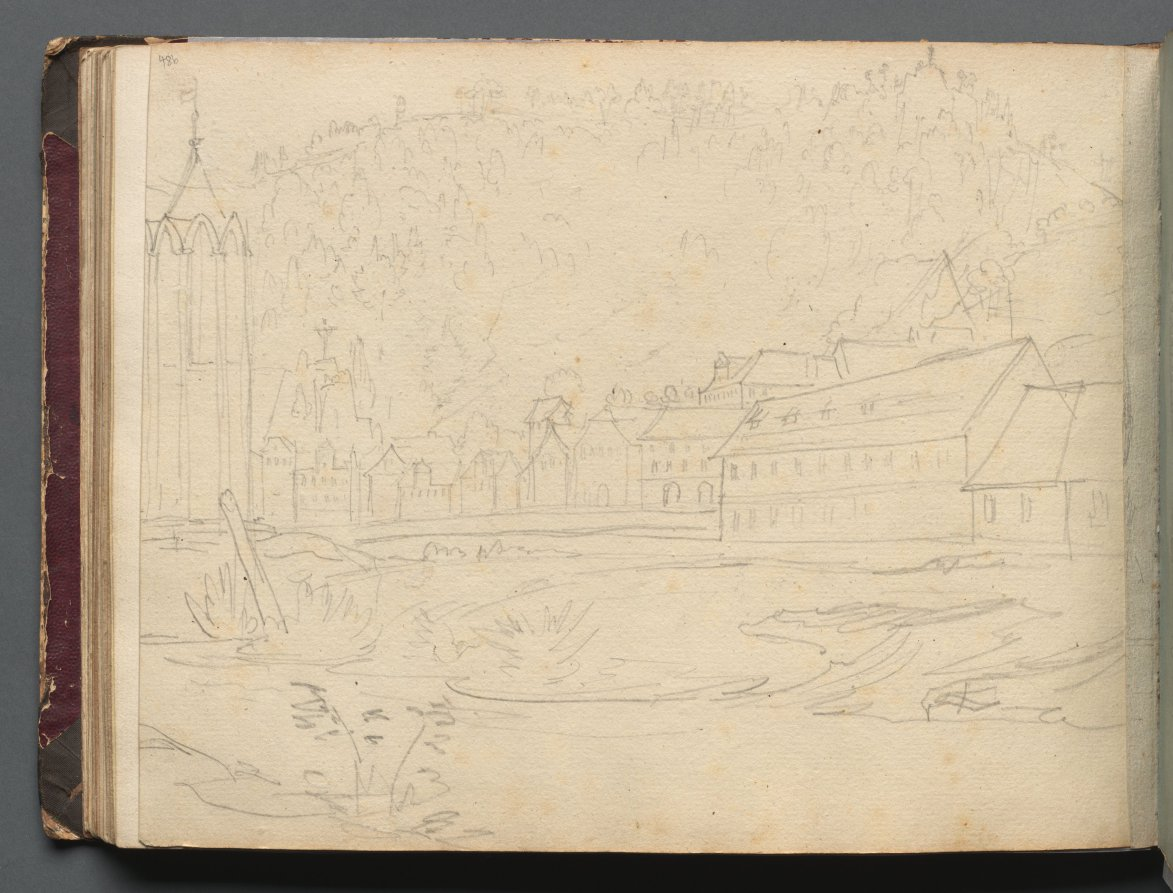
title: Album with Views of Rome and Surroundings, Landscape Studies, page 48b: Roman Landscape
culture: Germany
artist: Franz Johann Heinrich Nadorp (German, 1794–1876)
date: c. 1830s-70s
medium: graphite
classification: Bound Volume